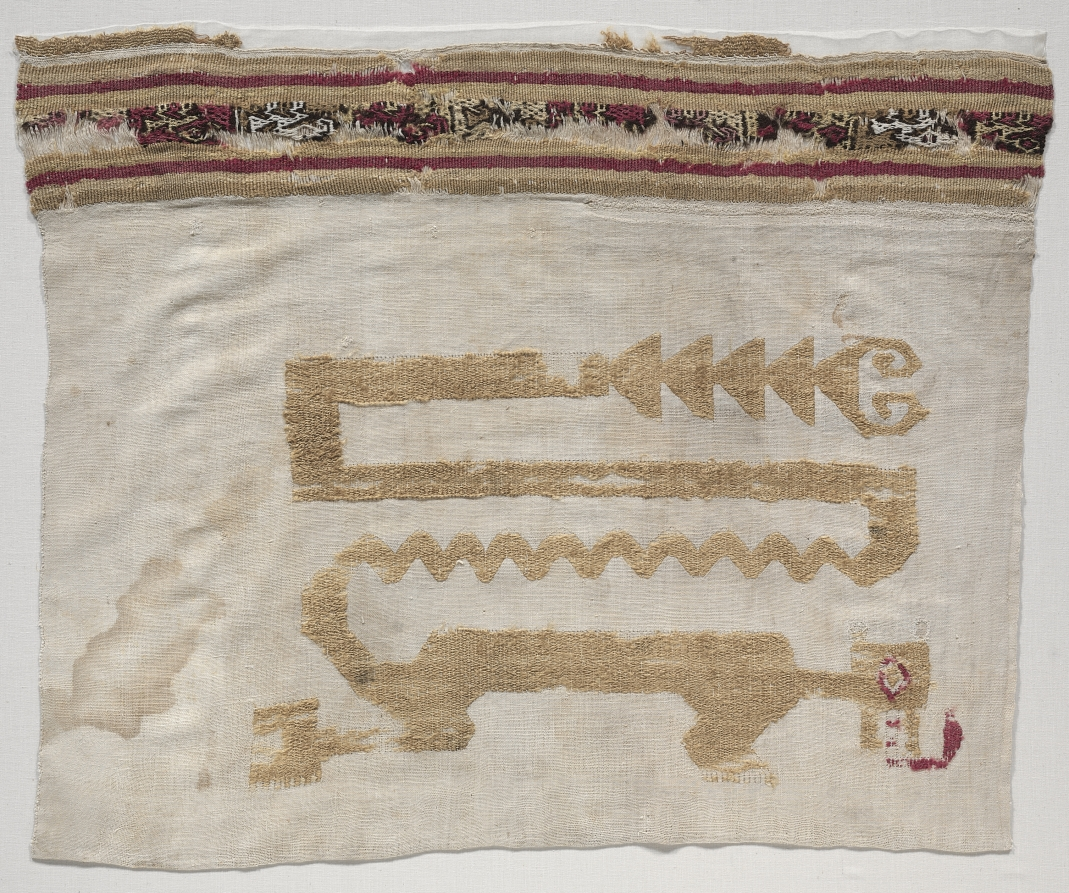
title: Fragment from a Mantle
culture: Peru, North Coast, Chimú Culture, 12th-15th century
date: c. 1100–1400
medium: tabby, brocaded; border: single-face pattern weave (fancy twill); cotton and wool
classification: Textile